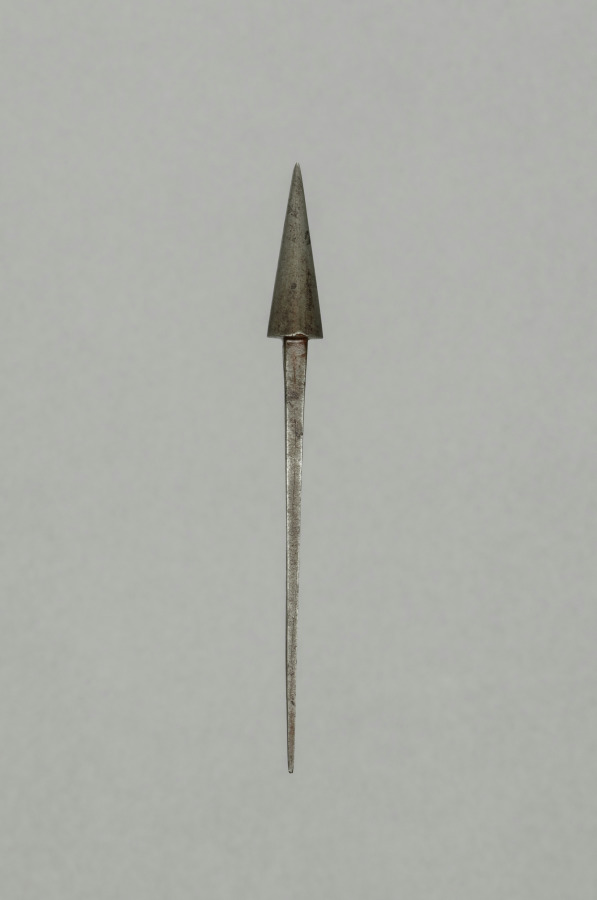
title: Arrow Point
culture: Japan, Edo period (1615–1868)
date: 1700s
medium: steel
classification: Arms and Armor